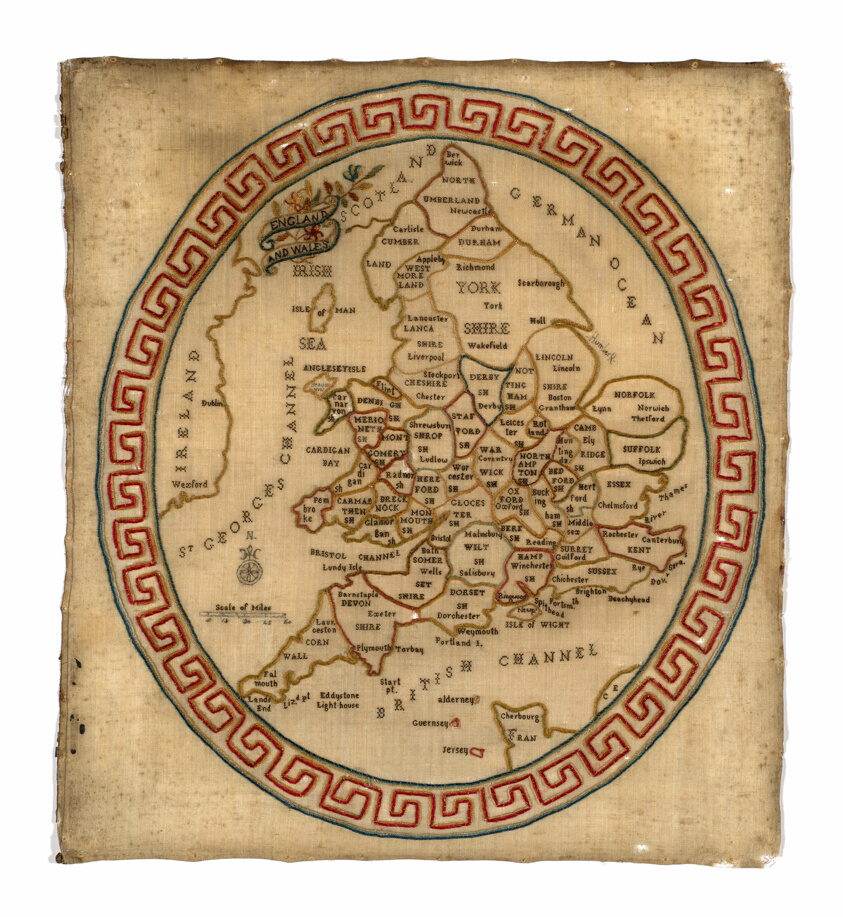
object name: Textile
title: Map Sampler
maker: England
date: c. 1800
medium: Linen, plain weave; embroidered with silk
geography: England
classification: textile; needlework (visual works); map